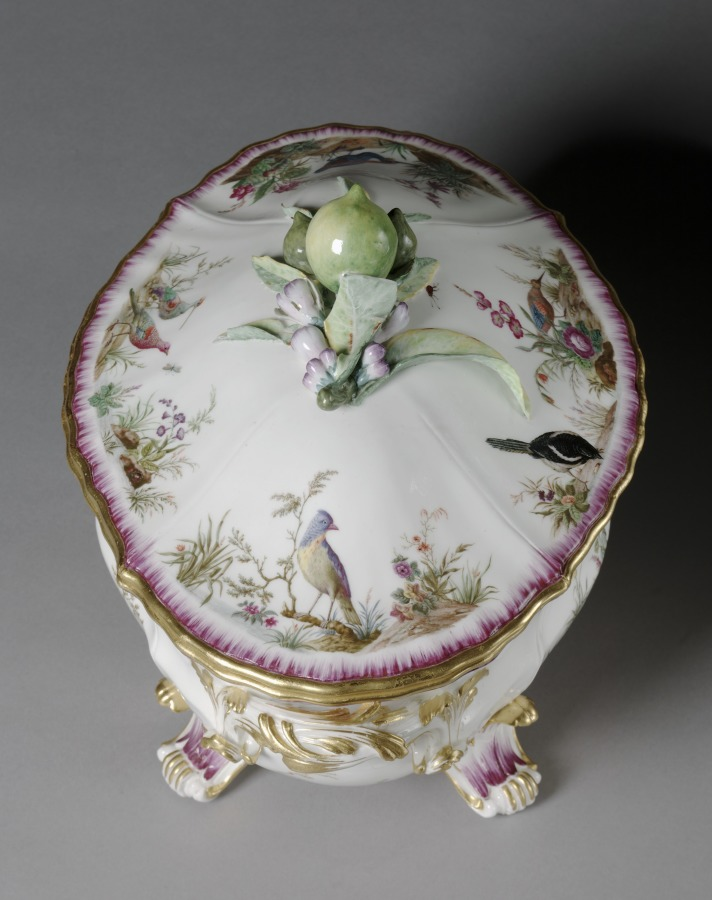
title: Covered Tureen (Terrine ancienne or Terrine ordinaire)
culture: France, Vincennes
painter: attributed to Louis-Denis Armand (French, active c. 1745–1783)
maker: Vincennes Porcelain Factory (France, 1740–56)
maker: probably by Jean-Claude Duplessis le Père (French, 1690–1774)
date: c. 1752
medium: soft-paste porcelain with enamel and gilt decoration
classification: Ceramic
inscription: [Interlaced foliate 'L's surmounted by a fleur-de-lys (indicating royal commision), in blue]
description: The intricately painted birds that decorate this tureen are the work of Louis-Denis Armand. Armand was known for his depictions of birds and landscapes, a specialty that may have come from his work as a painter of lacquered furniture with similar compositions. This tureen was likely designed by master goldsmith Jean-Claude Duplessis who began working as an artistic director at the Vincennes Porcelain Factory in 1748.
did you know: This object was manufactured in soft-paste porcelain, a material used by many European porcelain factories before they were able to emulate the hard-paste porcelain of China and Japan.